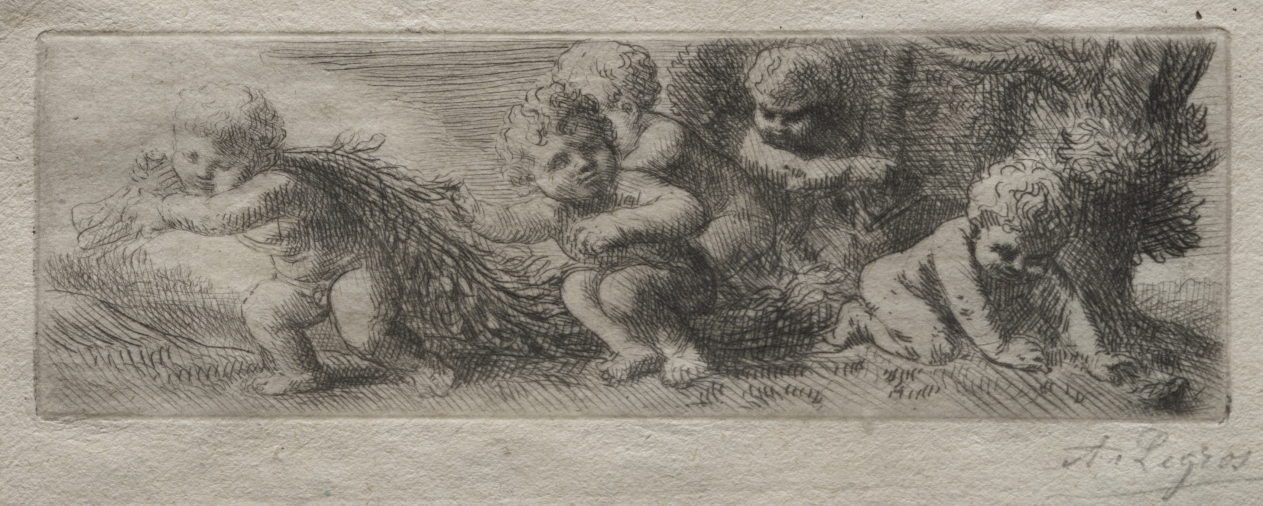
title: Plate for Top of Pin Box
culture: France, 19th-20th century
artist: Alphonse Legros (French, 1837–1911)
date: c. 1857–1911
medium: etching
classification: Print